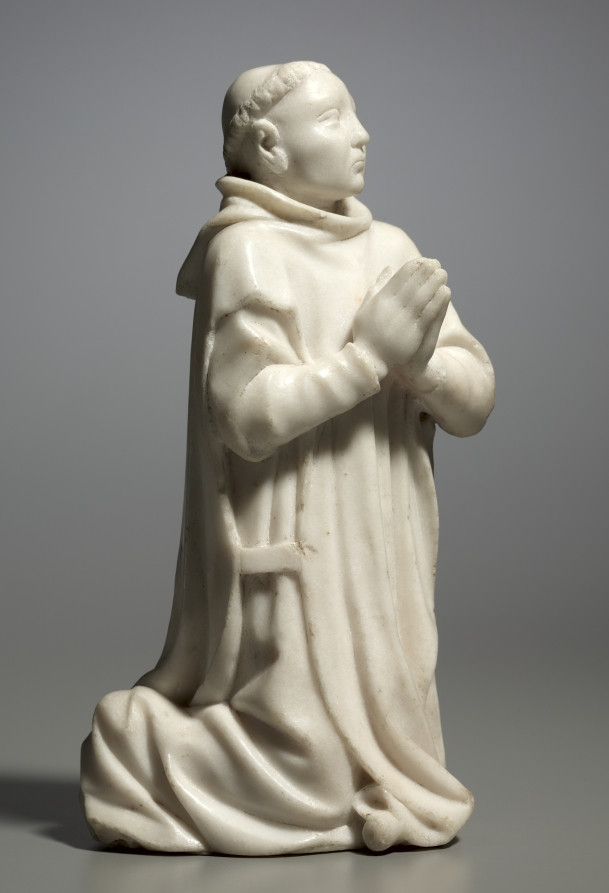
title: Kneeling Carthusian Monk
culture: France, Burgundy, Dijon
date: c. 1380–1400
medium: marble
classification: Sculpture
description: These are the only known surviving sculpted examples of kneeling Carthusian monks. Depictions of Carthusians in the same act of piety are found in paintings such as the one in this room from the Chartreuse de Champmol. These two figures are believed to come from the same Carthusian monastery as the mourners displayed nearby and would have formed part of a private devotional group, probably in a monk’s cell, with a sculpture of the crucified Christ or the Virgin positioned between them. They wear the recognizable white scapular, a hooded garment with front and back panels tied together with a tab.